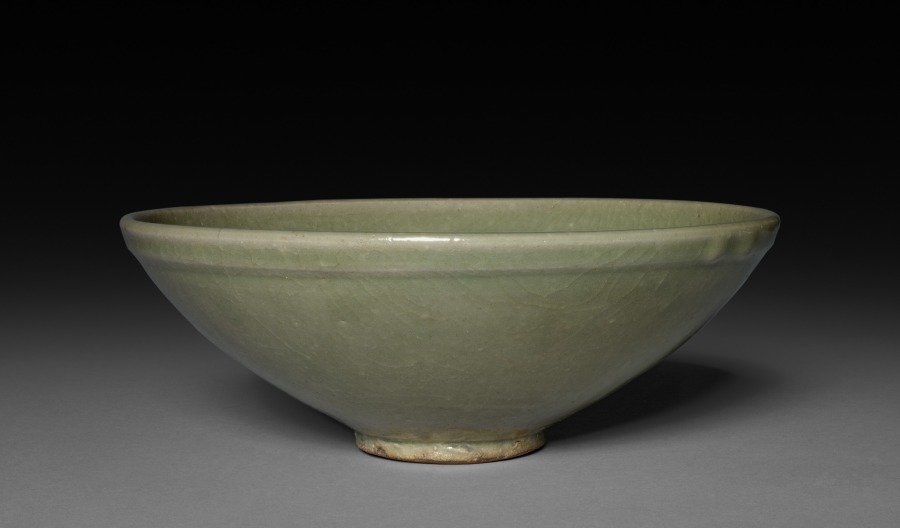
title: Bowl with carved floral decoration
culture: China, probably from the Yaozhou kilns, Shaanxi Province, Northern Song dynasty (960-1127)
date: 1100s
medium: Glazed porcelain, Northern Celadon ware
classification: Ceramic